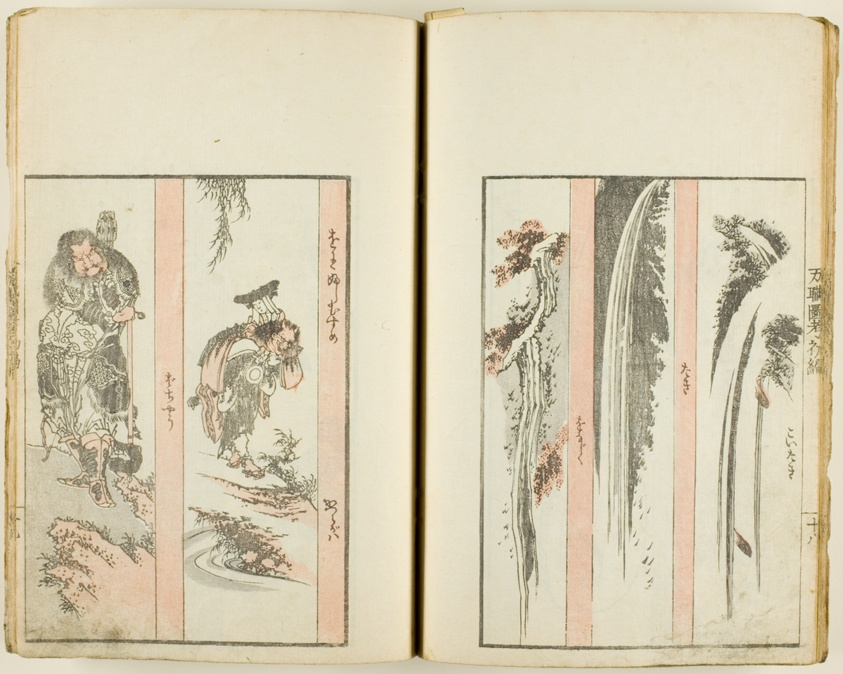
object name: Book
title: Banshoku zuko, one vol. of 5 published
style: Japanese (culture or style)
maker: Katsushika Hokusai 葛飾 北斎; Japanese, 1760-1849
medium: Book; woodblock printed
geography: Japan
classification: book; woodblock print